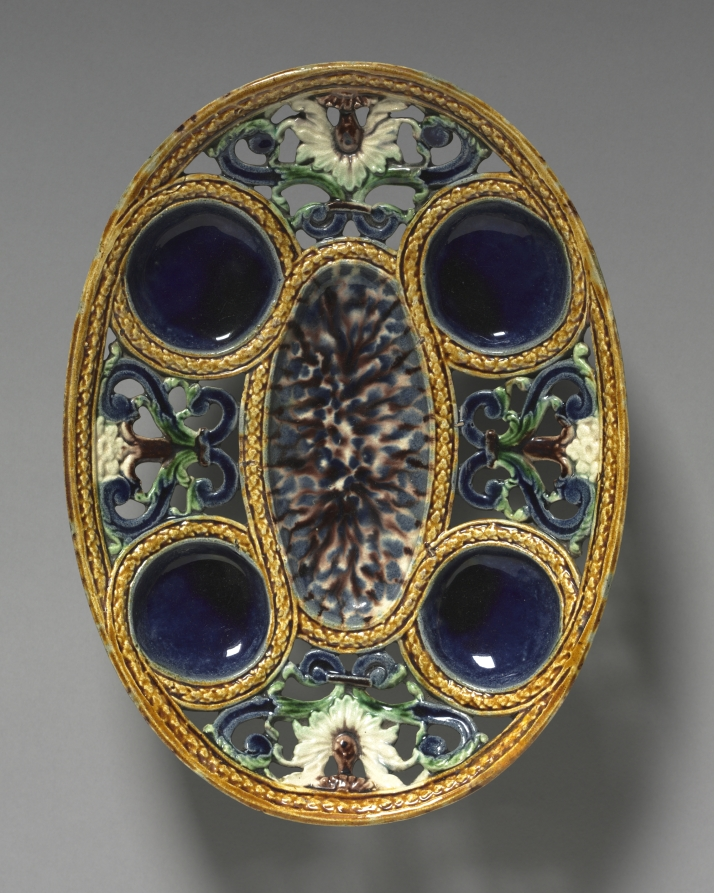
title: Oval Dish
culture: France, 16th century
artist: circle of Bernard Palissy (French, 1510–1589)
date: late 1500s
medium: earthenware and lead glazes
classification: Ceramic